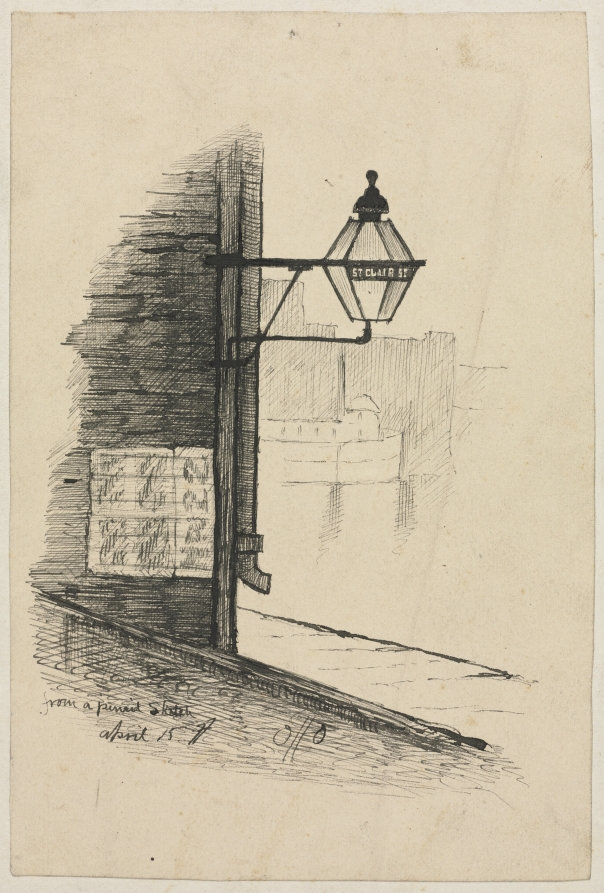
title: St. Clair Street, Cleveland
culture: America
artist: Otto H. Bacher (American, 1856–1909)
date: c. 1870–1909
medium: ink on paper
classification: Drawing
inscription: Signed, "Otto"